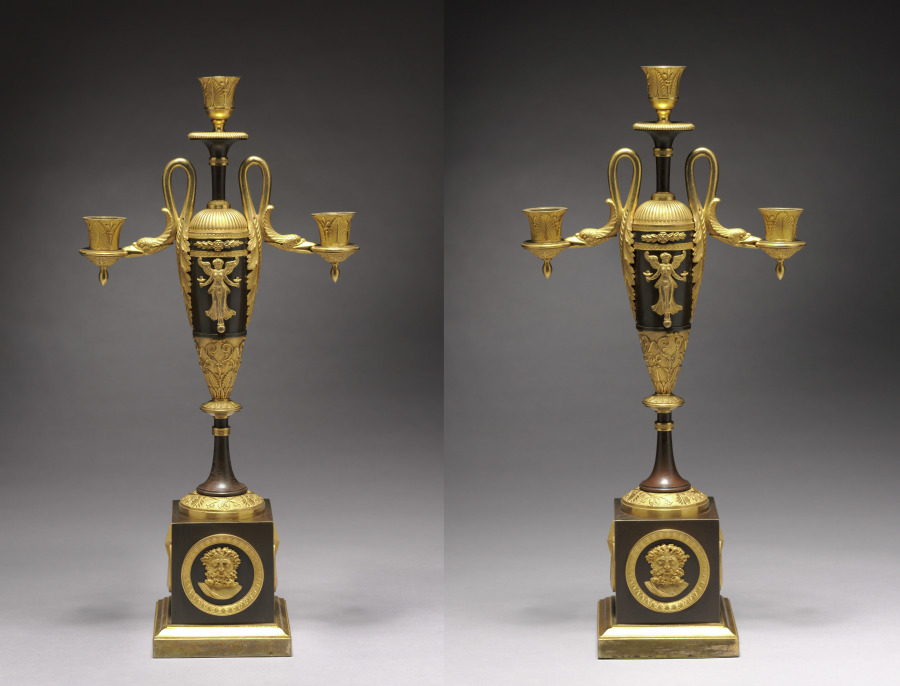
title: Candelabrums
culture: France, late 18th-early 19th century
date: c. 1800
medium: gilt and patinated metal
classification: Furniture and woodwork